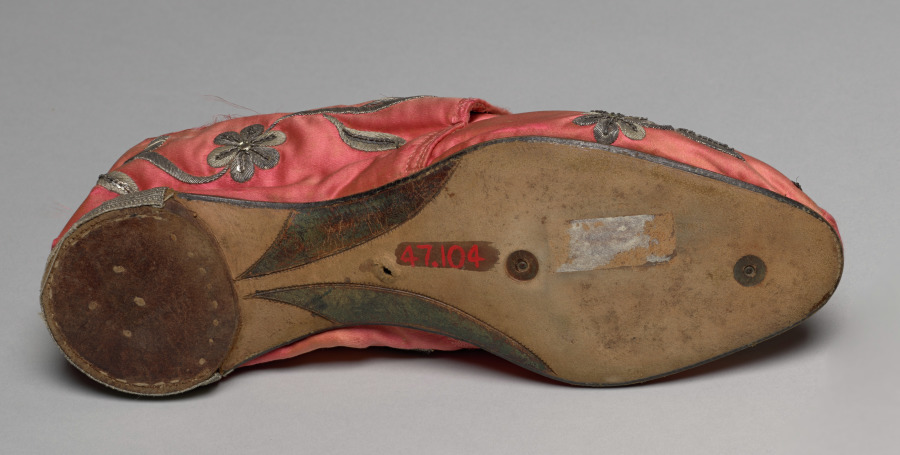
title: Slipper (one of a pair)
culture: Italy, Venice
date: early 1700s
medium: Silk: satin weave with silver metal thread embroidery and trim; spangles; leather soles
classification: Garment